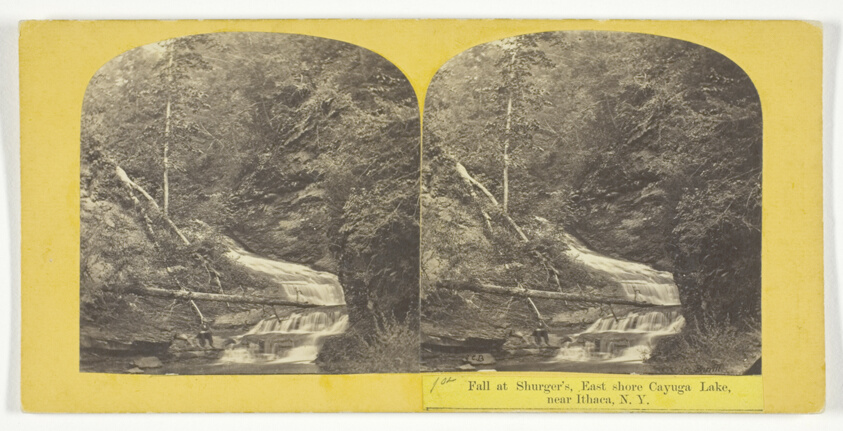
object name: Photograph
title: Fall at Shurger's, East shore Cayuga Lake, near Ithaca, N.Y.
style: 19th century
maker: J. C. Burritt; American, active 1860s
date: 1860/65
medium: Albumen print, stereo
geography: Ithaca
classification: photography; photograph; albumen silver print; stereograph (albumen)